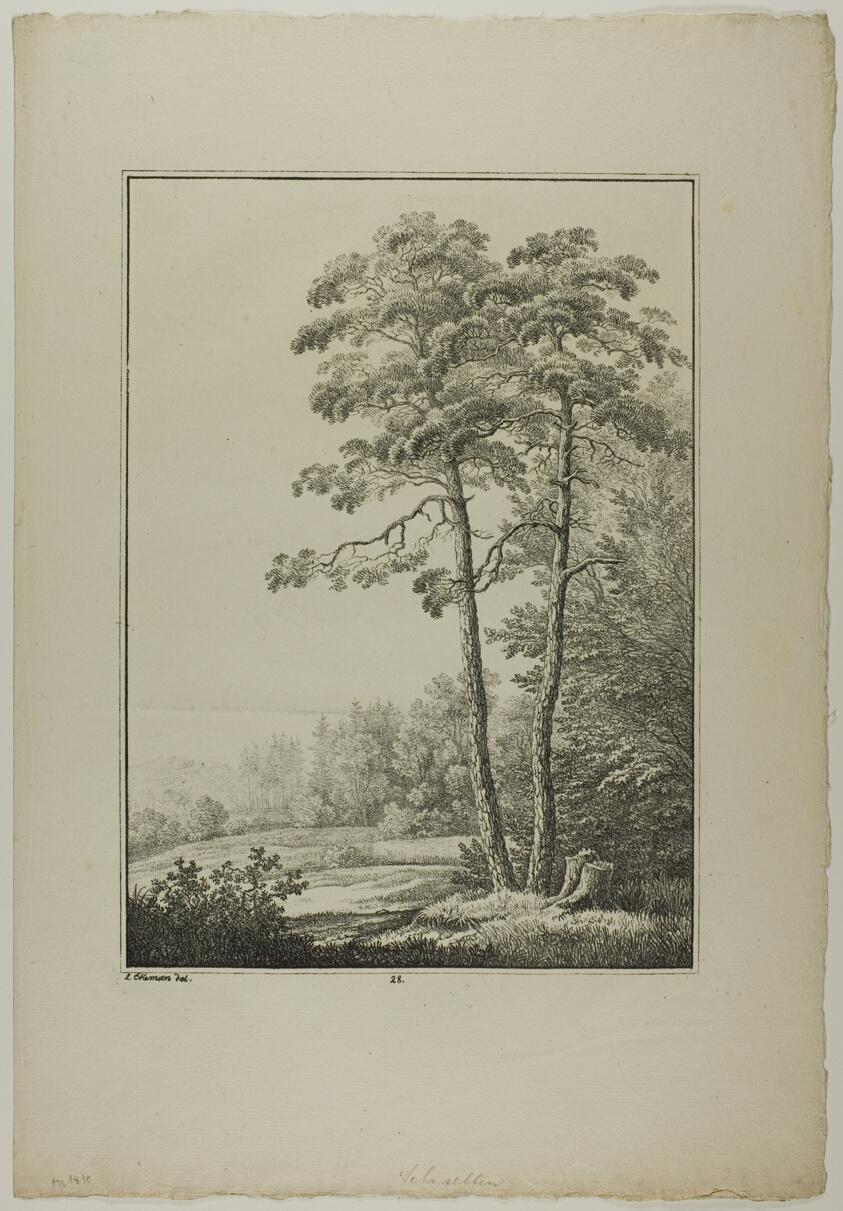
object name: Print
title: Plate 28 from Blatt Baum und Landschafts Studien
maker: Lorenz Ekemann Alesson (Swedish, 1791-1828)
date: c. 1810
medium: Lithograph on paper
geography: Sweden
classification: lithograph; print; prints and drawing